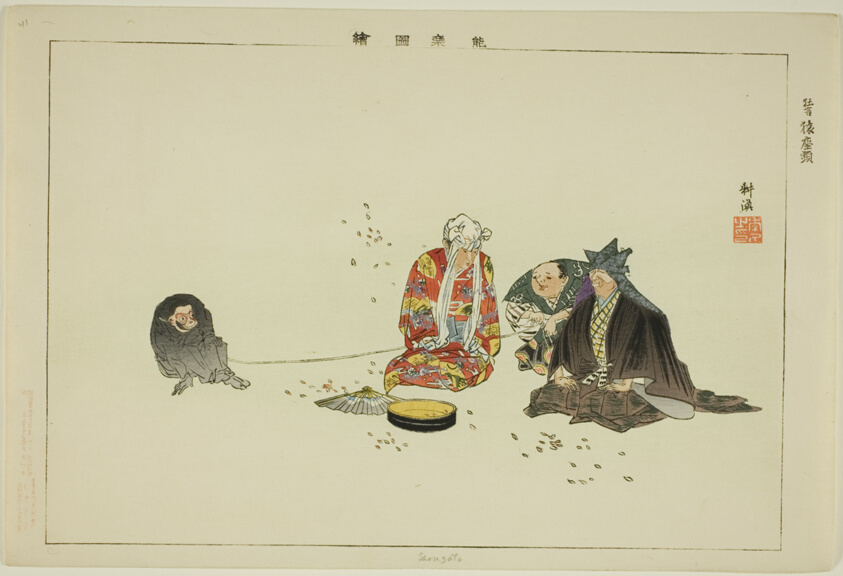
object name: Print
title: Sarusato, from the series "Pictures of No Performances (Nogaku Zue)"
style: Japanese (culture or style)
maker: Tsukioka Kogyo; Japanese, 1869-1927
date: 1898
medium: Color woodblock print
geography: Japan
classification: woodblock print; print; asian art